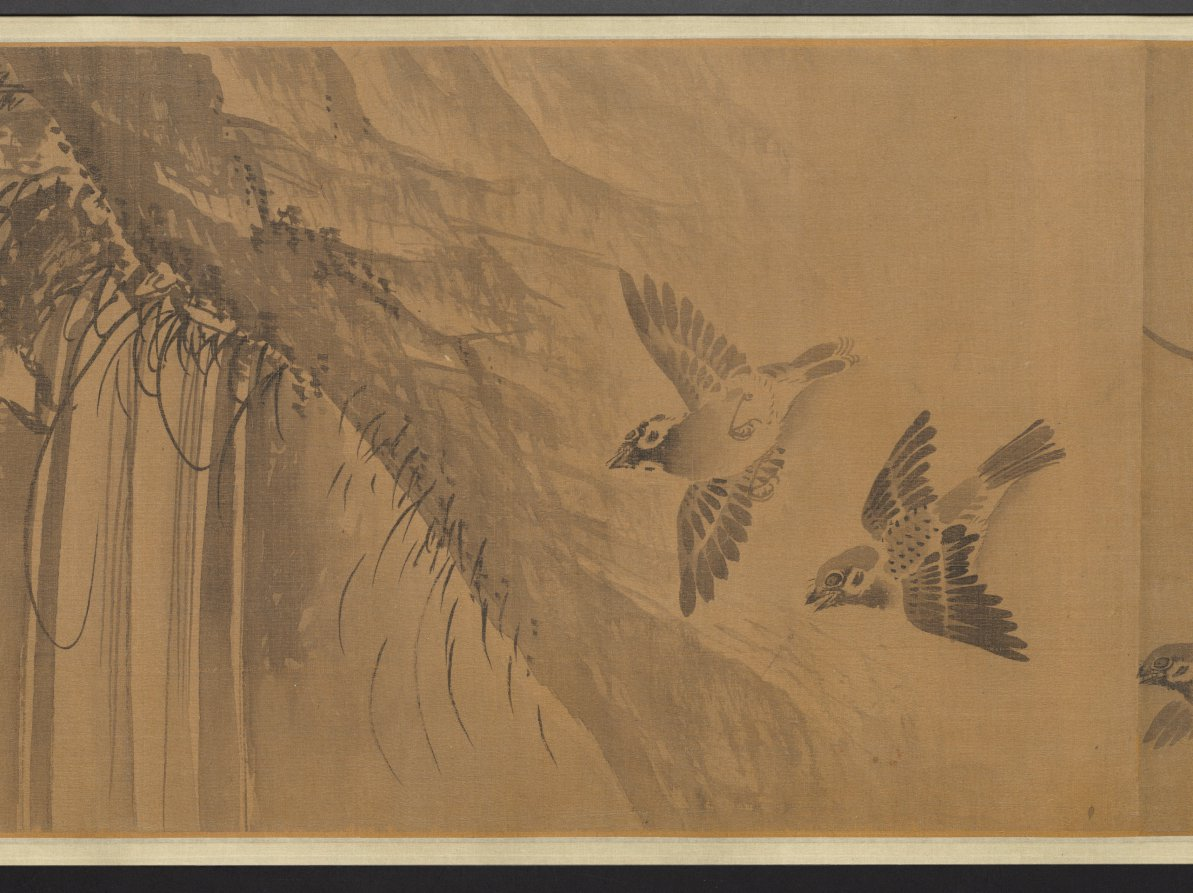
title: A Hundred Sparrows in a Lofty Grove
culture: China, Ming dynasty (1368–1644)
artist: attributed to Lin Liang (Chinese, 1416–1480)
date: 1368–1644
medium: handscroll; ink on silk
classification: Painting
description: Sparrows engaged in all kinds of activities frolic amid leafy branches, blades of grass, rocks, and a waterfall. As our eyes move over the scroll, the artist engages us in enjoying the sparrows’ carefree movements in a natural setting. The charming birds were painted from close observation in swift and fluent brushstrokes. Sparrows are a common bird and in Chinese painting they often represent the commoner in human society as opposed to the noble pheasant or peacock representative of the ruling class.